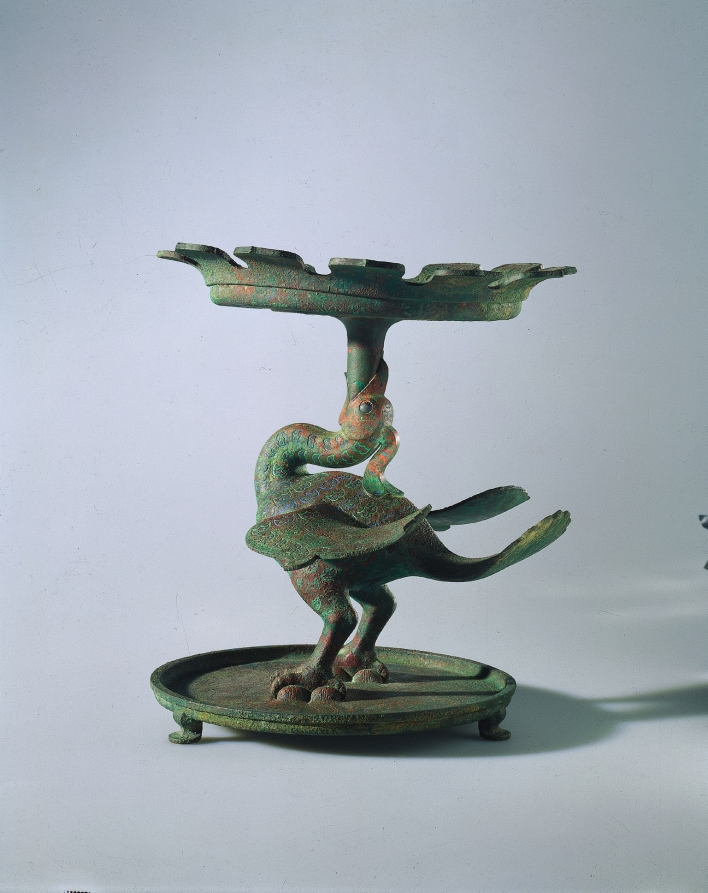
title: Shallow Basin Supported by a Bird (Bian)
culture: China, Warring States period (475–221 BCE)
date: early 400s BCE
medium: bronze inlaid with powdered malachite and azurite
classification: Metalwork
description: The bird, in its graceful and dignified pose, firmly grasps a pair of intertwined serpents cast in the lower basin. This composition of the bird's triumph over the serpent has been given various interpretations. The Chinese ethnographers regard this as a totemic symbol—a suggestion of a specific clan's superiority over contending neighboring peoples. Other scholars interpret this as good creatures warding off evil influences or as an early manifestation of the concept of complementary pairing (yin-yang, heaven-earth) in Chinese cosmology. The original appearance of this vessel was brilliant and colorful due to the use of malachite and azurite in inlaid decoration, producing red, green, and blue against the bronze surface.